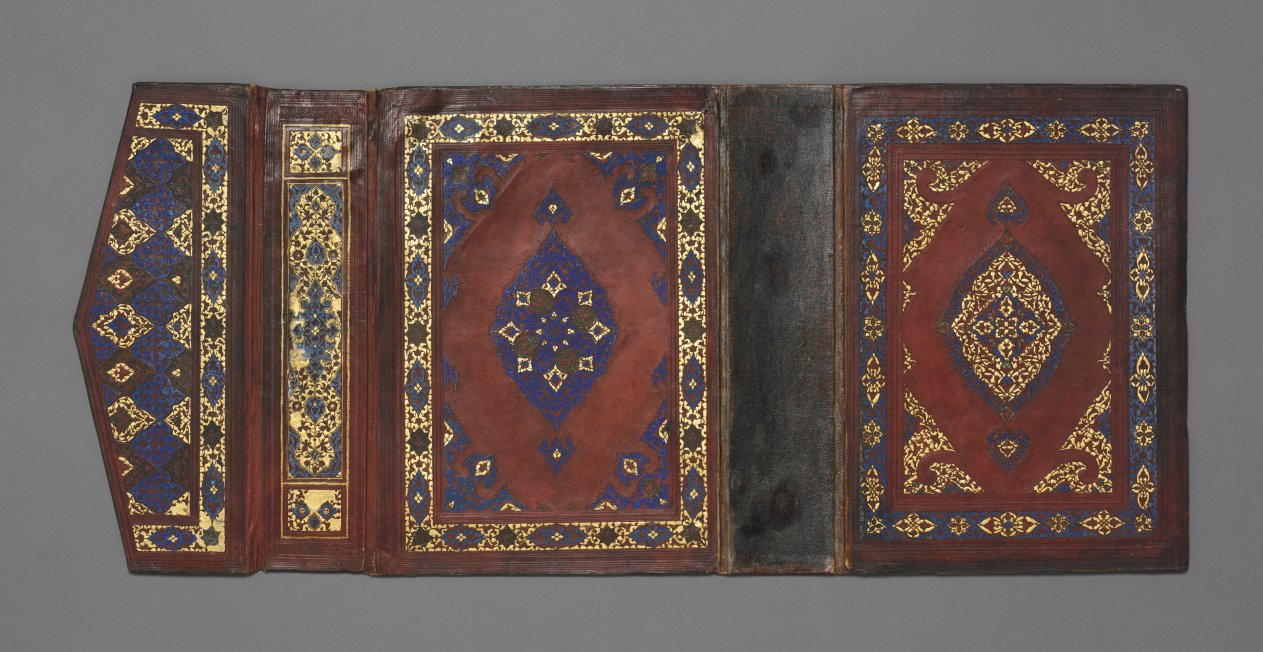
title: Bookbinding for a Qur'an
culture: Turkey, Istanbul, Ottoman period, 15th century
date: 1460–1500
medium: leather over paper pasteboards; outer cover tooled, blue paint; inner covers openwork designs over colored papers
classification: Book Binding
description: Islamic book covers generally have a triangular flap attached to the rear cover of the binding which is tucked under the front cover to protect the outside edge of the pages. The outer covers of this particularly elaborate example feature panels with Qur'anic inscriptions, interlace patterns, and a central medallion filled with floral and arabesque designs. The inner covers offer a superb example of leather openwork, a leather technique that originated in northeastern Iran in the 1400s.